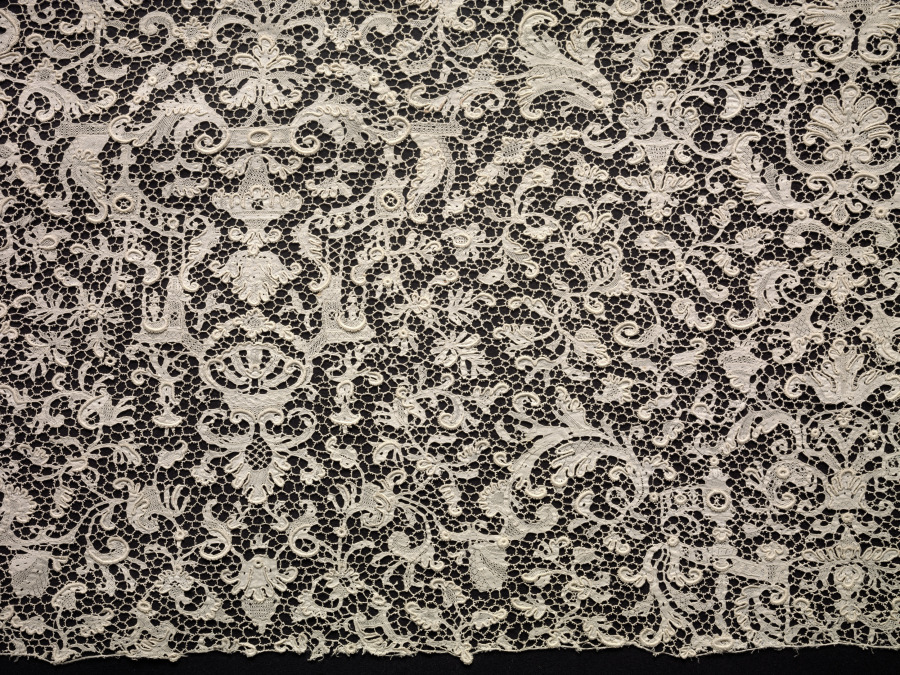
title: Fragment of Lace Flounce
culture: France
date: 1700–1715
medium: Linen: needle lace (Point de France)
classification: Lace